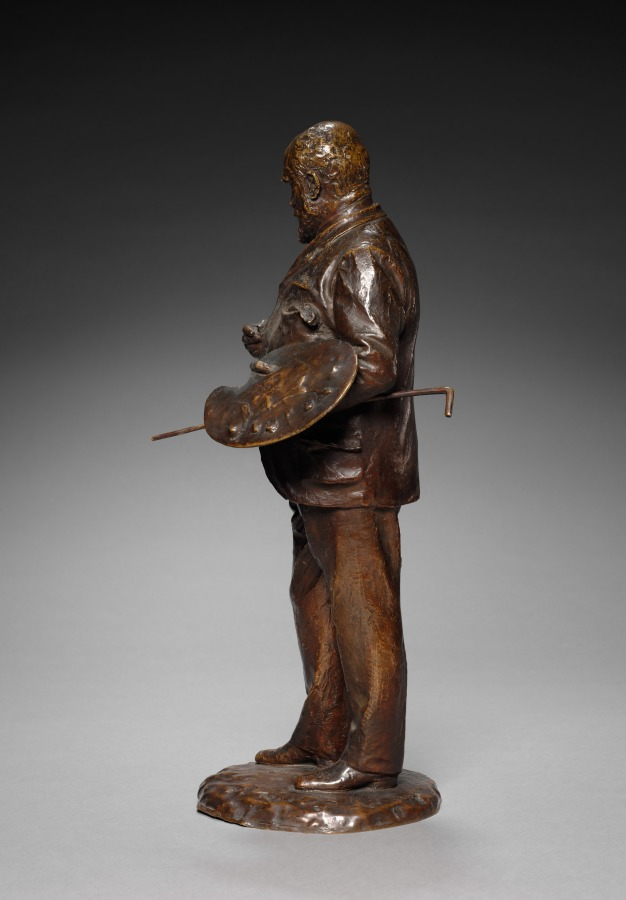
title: Standing Figure of Léon Bonnat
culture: France, 20th century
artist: Denys Pierre Puech (French, 1854–1942)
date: 1903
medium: bronze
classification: Sculpture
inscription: Signed and dated: "1903"; inscribed: "au maitre L. Bonnat"